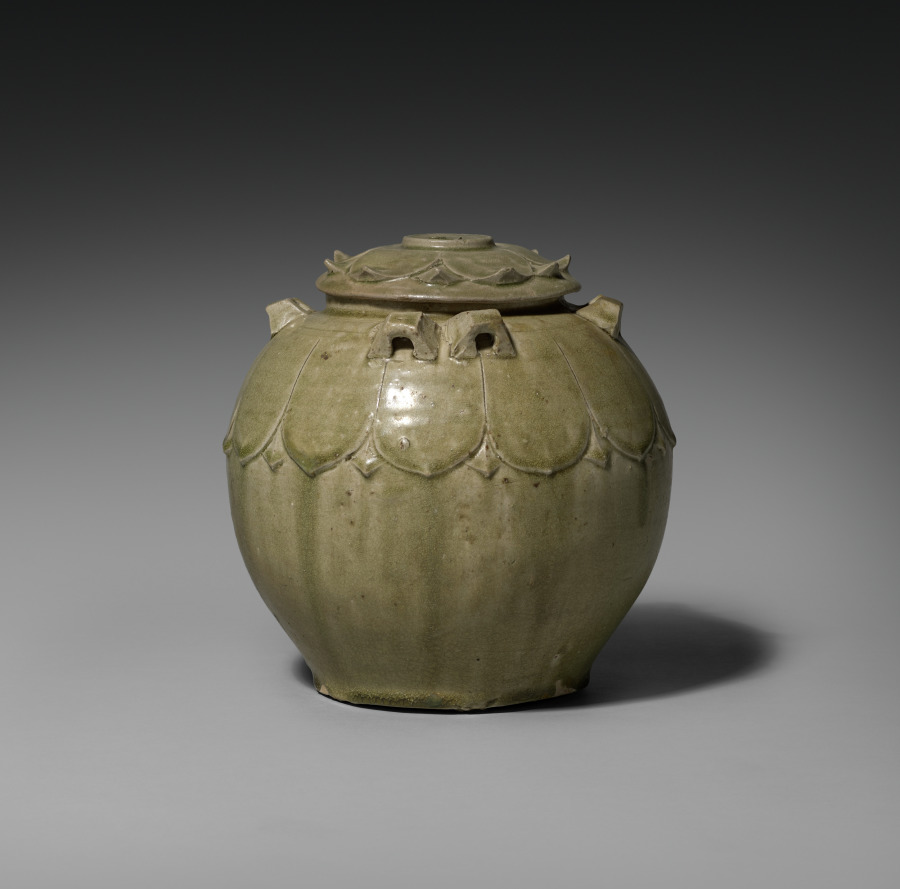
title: Covered Jar with Carved Lotus Petals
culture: China, Northern Dynasties period (386-581)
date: 386–581 CE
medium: Glazed stoneware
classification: Ceramic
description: This jar still has its original cover, which is rare among surviving examples. Its missing knob most likely had the shape of a lotus bud. Beautifully carved lotus petals cover the vessel’s shoulder and lid under a translucent green glaze. In Buddhism, the lotus is a flower symbolizing purity and detachment from worldly affairs; its presence suggests that this vessel was meant to be used in a religious context. The well-crafted double loop handles may have held a silk cloth or other textile that would have been folded over the lid to keep it in place. This aesthetic prefigures the celebrated green celadons in adjacent regions.